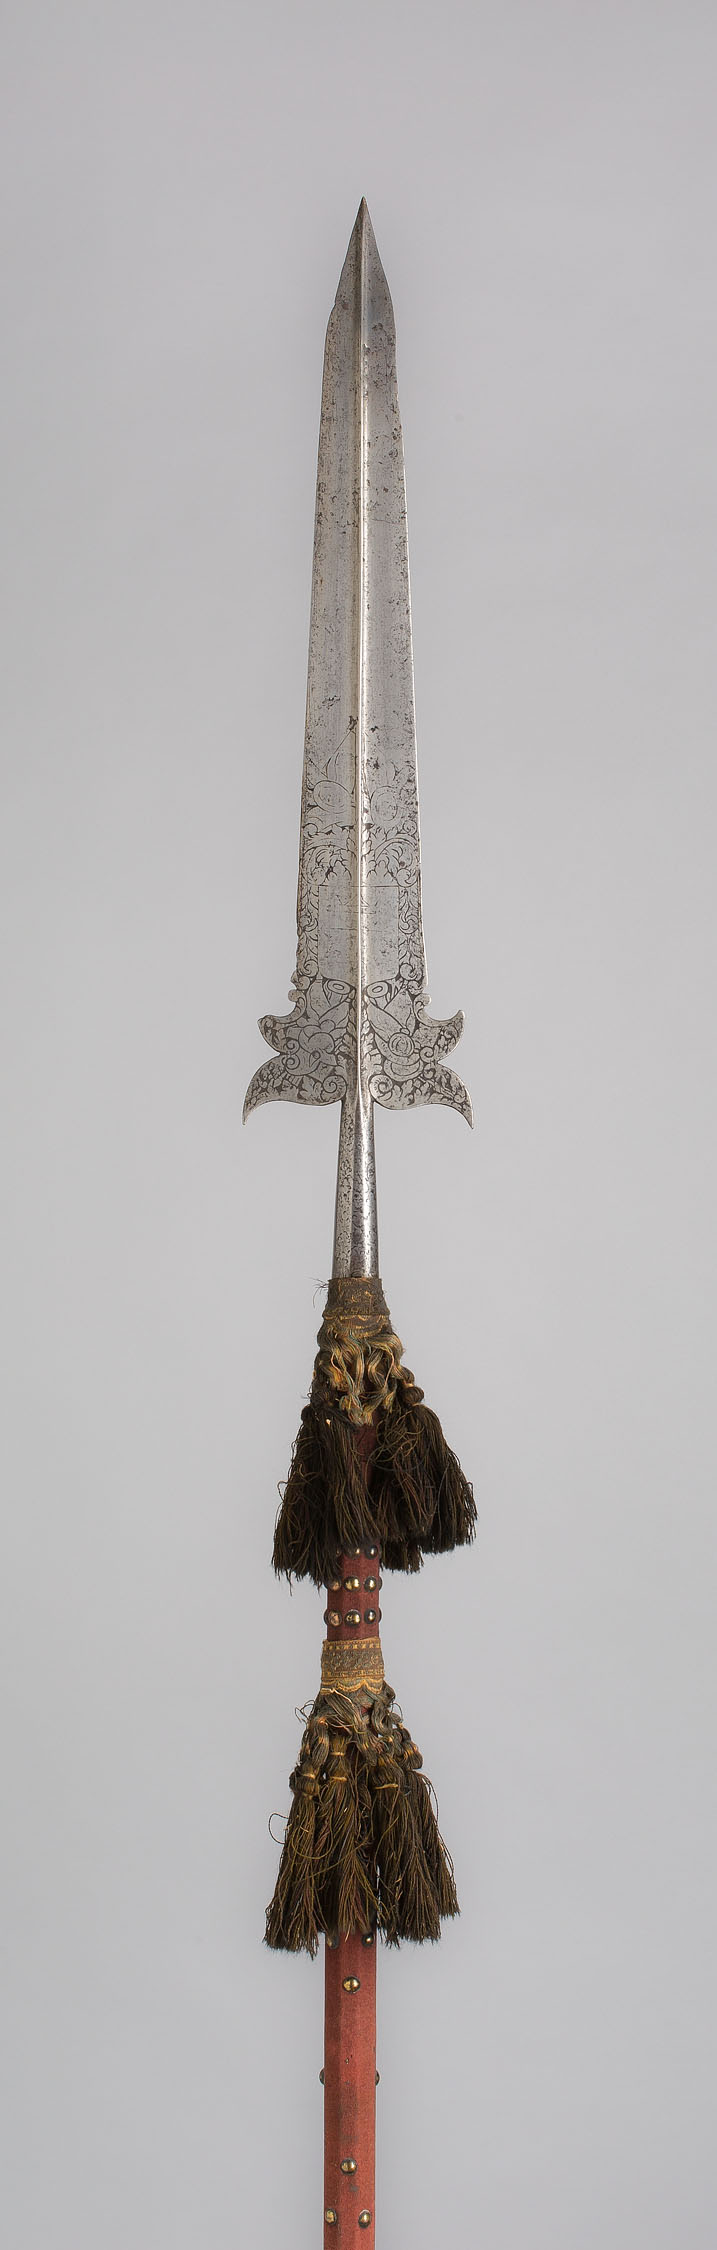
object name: Arms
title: Partisan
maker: Italian, perhaps Netherlandish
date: early 17th century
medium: Steel, wood, cloth, brass, and cotton tassels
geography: Italy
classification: edged weapon-staff; arms; arms and armor